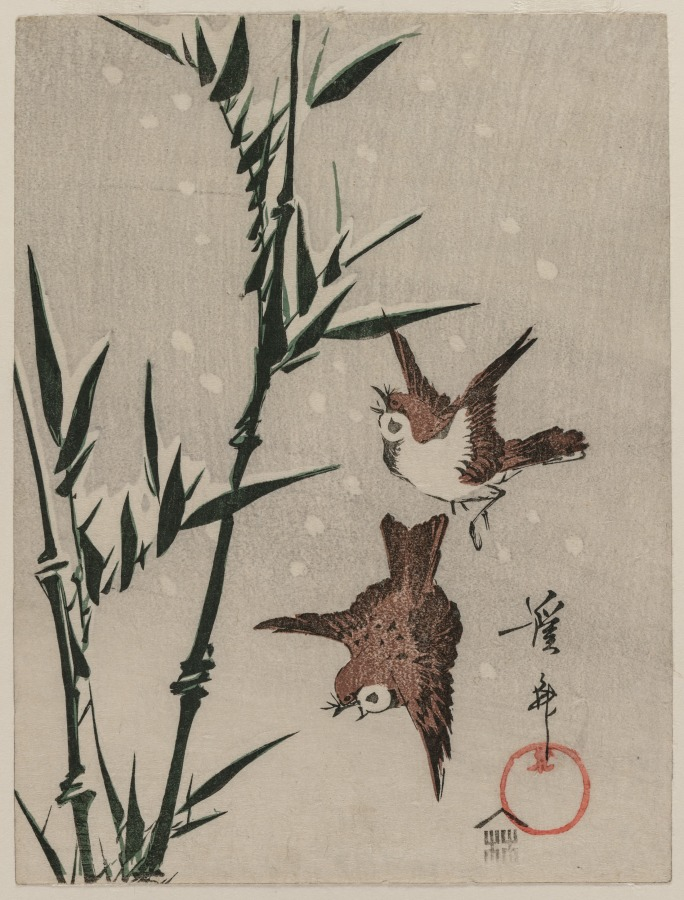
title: Sparrows, Bamboo and Falling Snow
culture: Japan, Edo period (1615–1868)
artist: Keisai Eisen (Japanese, 1790–1848)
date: c. late 1820s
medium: color woodblock print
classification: Print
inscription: Signature: Keisai Seal: Sen Publisher: Iseya Rihei (emblem)